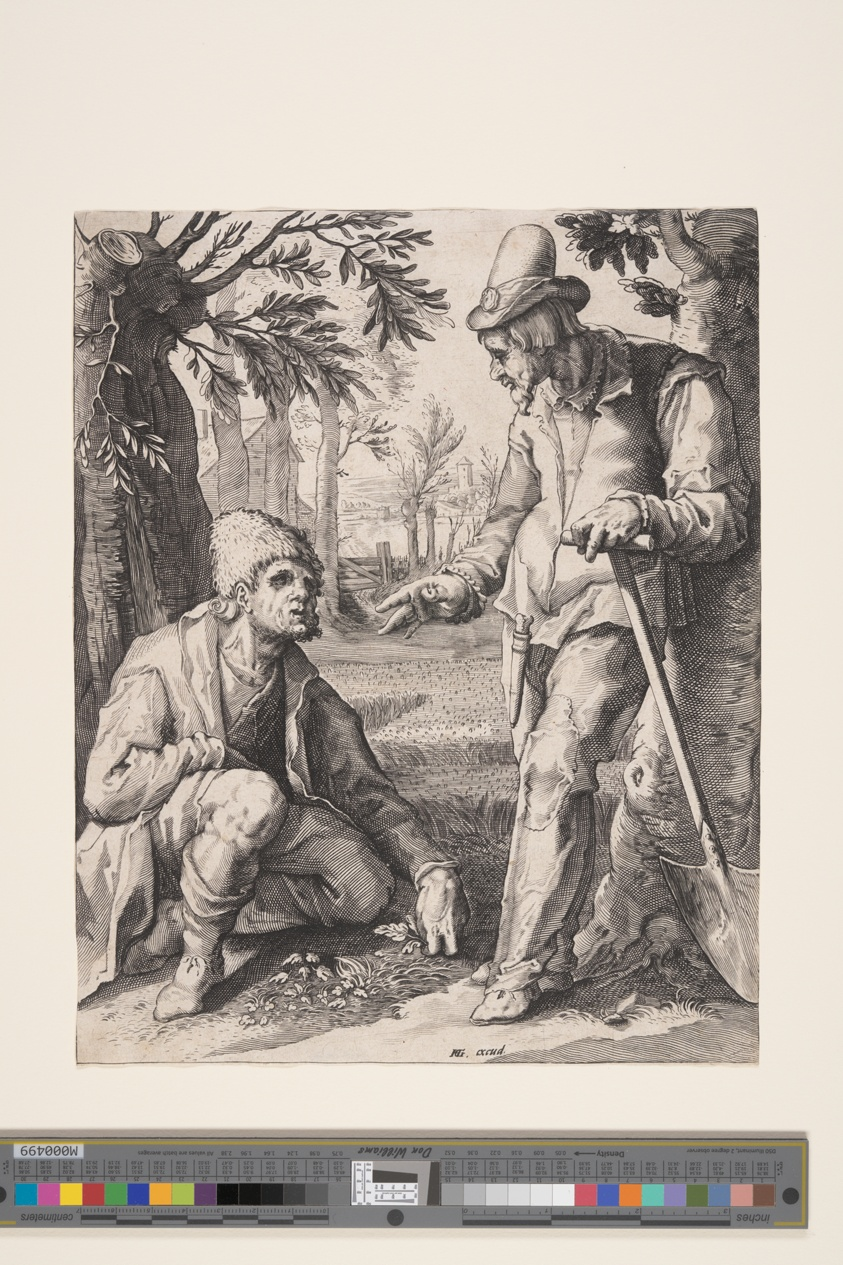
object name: Print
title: Two Peasants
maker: Attributed to Jacob Matham (Dutch, 1571–1631); after Hendrick Goltzius (Dutch, 1558–1617)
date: c. 1590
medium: Engraving on laid paper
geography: Netherlands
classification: print; engraving; paper; prints and drawing